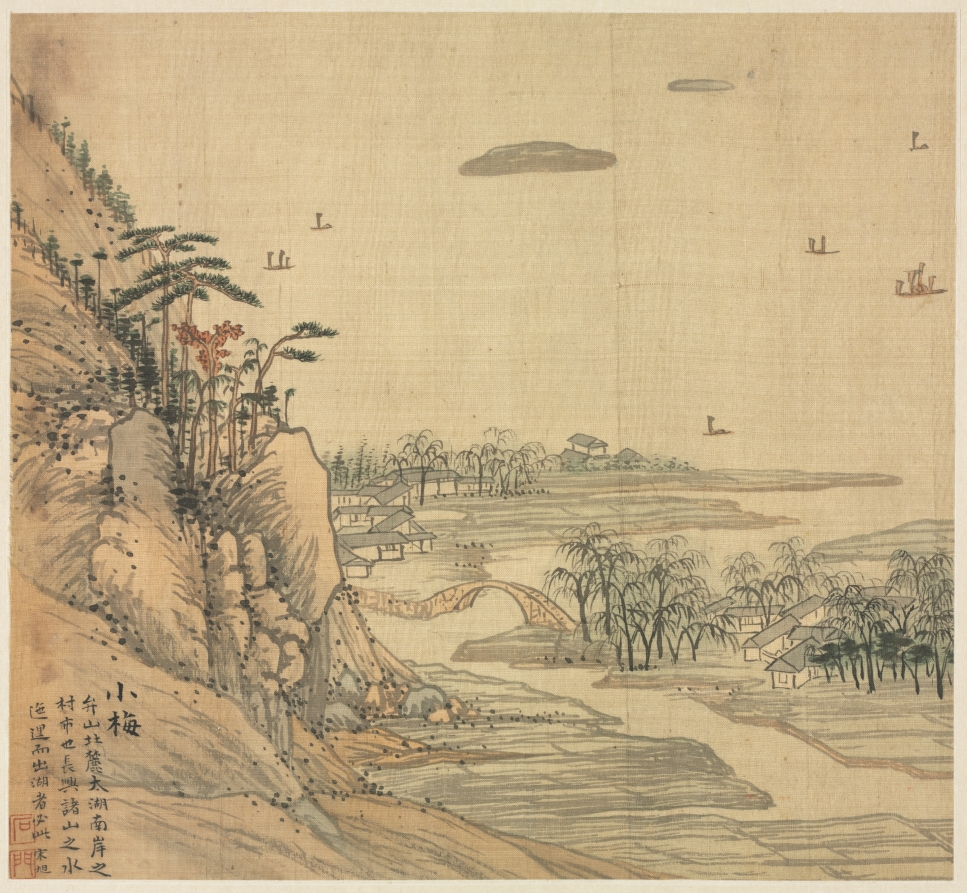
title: Xiaomei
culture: China, Jiaxing, Ming dynasty (1368–1644)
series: Eighteen Views of Huzhou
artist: Song Xu (Chinese, 1525-c. 1606)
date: c. 1588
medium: Album leaf; ink and color on silk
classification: Painting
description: By the 1500s, visits to historic and scenic sites in the lower Yangzi delta stimulated an increase of printed illustrated travel books. Topographical depictions of local scenery flourished. Leaves from this album illustrates sites around Lake Tai of the two adjacent counties Changxing and Wuxing (modern Huzhou). Song Xu, who lived intermittently in Jiaxing and Songjiang, must have passed through Wuxing by boat and thus knew the region. The paintings are inscribed with gazetteerlike notations, suggesting that the album was produced for clients as commemorative works, a travel guide, or for “armchair travel” (woyou) in one’s mind.